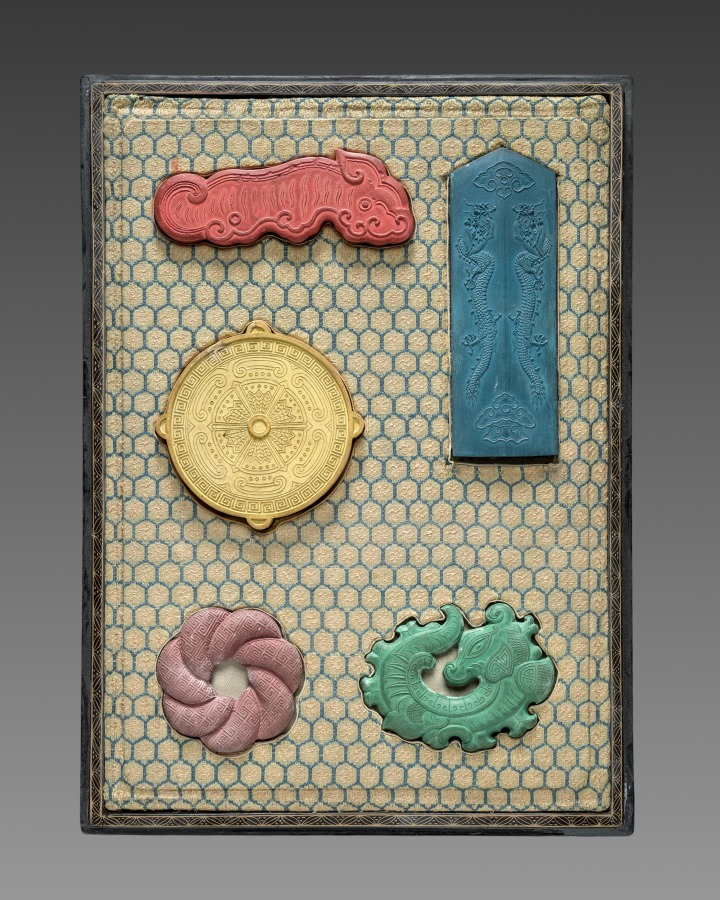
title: Box with Ink Cakes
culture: China, Qing dynasty (1644-1911), Jiaqing reign (1795-1820)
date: 1795–1820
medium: Lacquer and silk box; molded ink in red, yellow, blue, and green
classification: Lacquer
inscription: 江西巡撫臣陳淮恭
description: Ink cakes (also called ink sticks) are dissolved with the addition of water and then ground on the surface of a flat square stone into liquid ink for painting and calligraphy. The precious ink cakes here, however, have never been used. The inscription on the side of the blue Gui scepter-shaped ink cake says that the set was commissioned by Chen Huai, Governor of Jiangxi province. The green and bright red ink cakes take the forms of archaic dragons. The dull red ink cake resembles a brocade knot. The yellow cake shaped like the Buddhist "Wheel of the Law" is inscribed on the reverse.